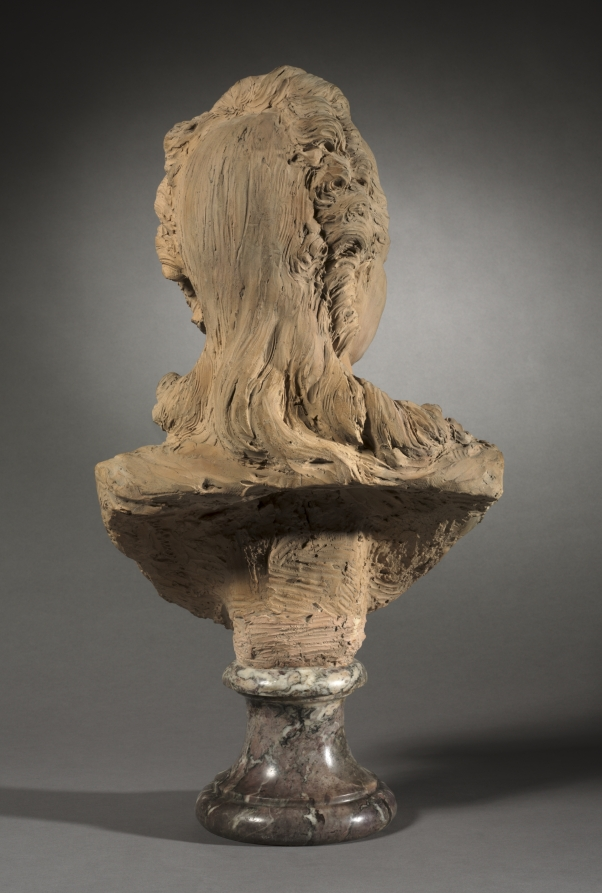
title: Portrait of Melle de Vandeul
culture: France, 18th century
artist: Jean-Baptiste Lemoyne (French, 1704–1778)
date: possibly 1760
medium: terracotta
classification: Sculpture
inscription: Signed underneath shoulder: J. B. Lemoyne (incised).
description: Lemoyne specialized in portrait busts of wealthy Parisians. In this case, the sitter is a close relative of important French critic and writer Denis Diderot.